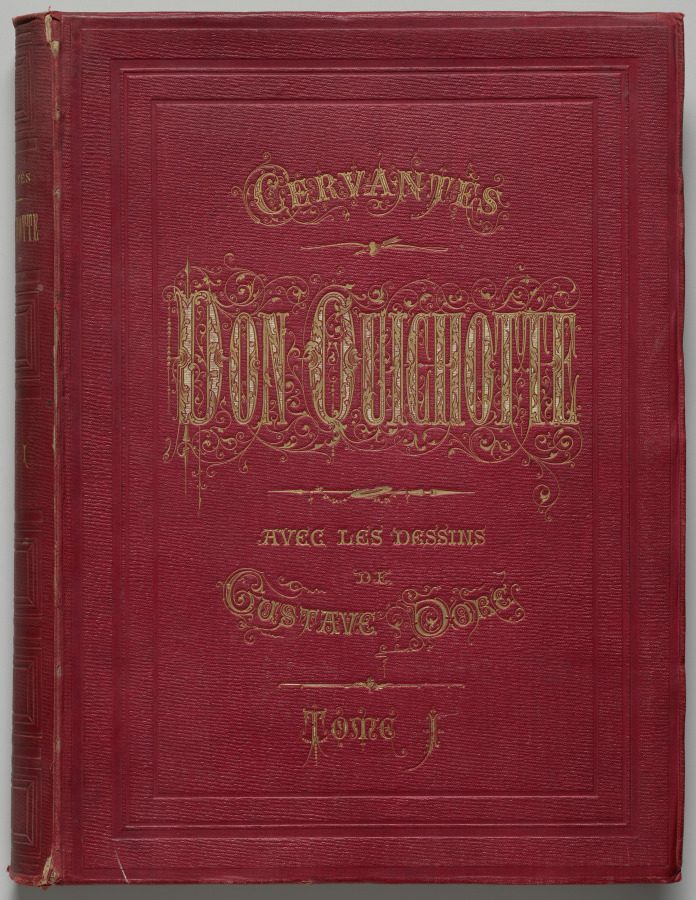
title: Don Quixote (vol I)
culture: France, 19th century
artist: Héliodore Pisan (French, 1822–1890)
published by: Hachette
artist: after Gustave Doré (French, 1832–1883)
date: 1863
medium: wood engraving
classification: Bound Volume